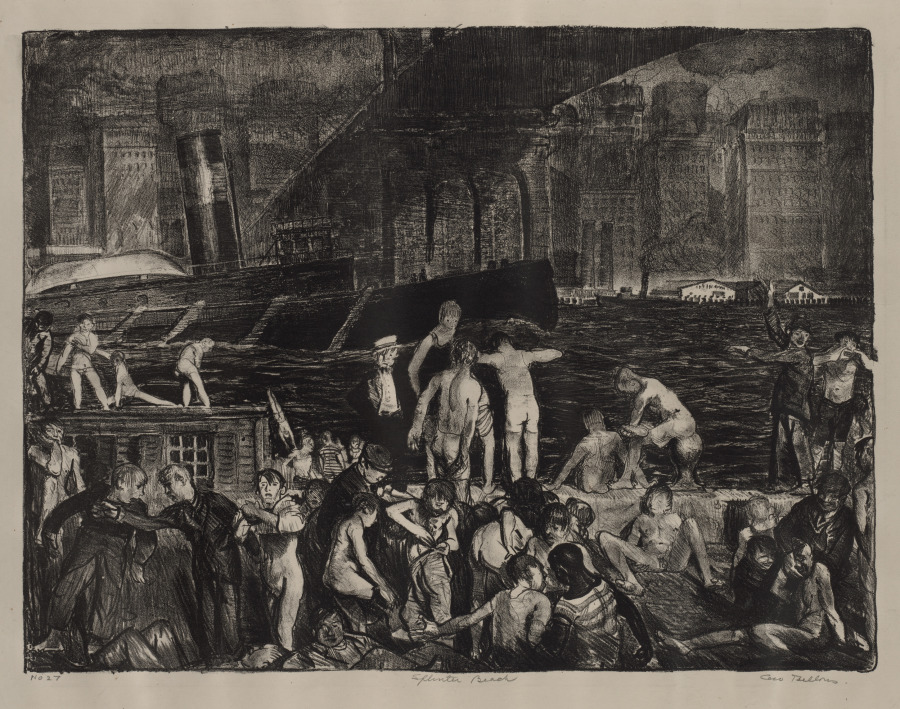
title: Splinter Beach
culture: America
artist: George Bellows (American, 1882–1925)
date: 1916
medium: lithograph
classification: Print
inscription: In graphite, lower left, recto: "No 27"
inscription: In graphite, center, recto: "Splinter Beach"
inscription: In graphite, lower right, recto: "Geo. Bellows"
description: During George Bellows’s first decade in New York City, starting in 1904, newspapers ran many stories about the “social problem” of the urban poor, reporting that the city’s tenement district lacked cleanliness and order. Drawn to this unvarnished side of city life, Bellows made several images of the public docks along the East River that were unofficial places of recreation for the city’s tenement children. Both Splinter Beach and River-Front feature, without sentimentality, children that display their nakedness unabashedly. Disturbingly, both images feature fully clothed adults observing or even touching children, as well as other sexual touching. Portrayals of sexual indecency in Bellows’s work aligned with the off-color humor often found in fictional representations of the urban poor of the time.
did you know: Splinter Beach was located under the Brooklyn Bridge, the underside of which can be seen in this image.